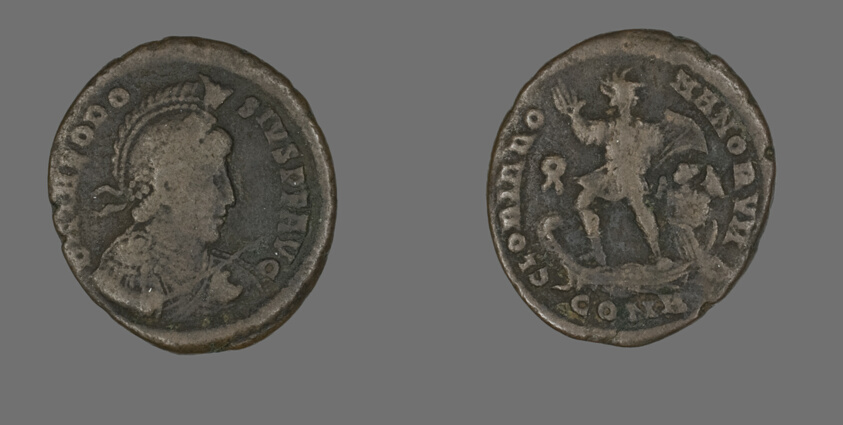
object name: Coin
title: Coin Portraying the Emperor Theodosius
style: roman (ancient, style or period), ancient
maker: Roman, minted in Constantinople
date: 379-395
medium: Bronze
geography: Roman Empire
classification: coin; ancient art